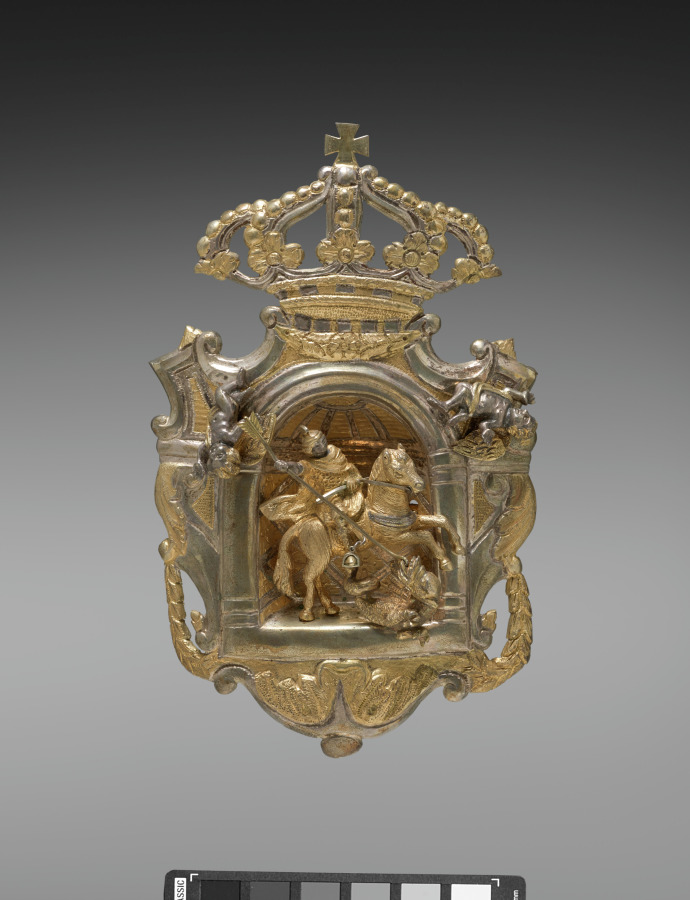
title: Woman's Costume (Metal Belt Buckle)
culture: Italy, Sicily, 19th century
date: 1800s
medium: silver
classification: Metalwork